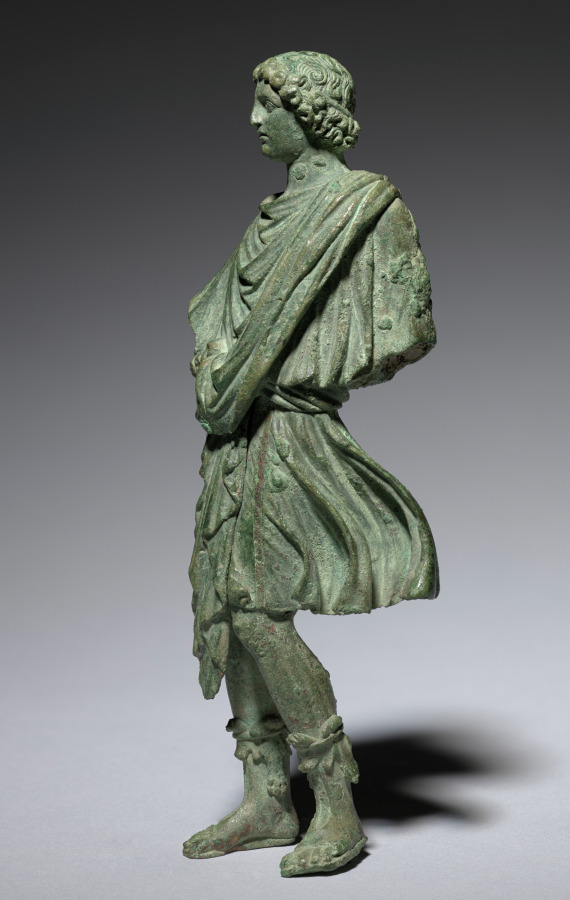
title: Lar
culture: Italy, Rome, Early Imperial period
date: 1–25 CE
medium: bronze with copper inlays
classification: Sculpture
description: This youthful bronze figure wears a short tunic with copper inlaid stripes and open-toed boots with animal-skin liners. The figure’s arms are missing, but based on other surviving examples, they likely held a libation dish and cornucopia. Even without these attributes, the figure can be identified through dress and stance as a type of Lar, or domestic deity, known as the Lar Familiaris (Household Lar), standing in a characteristic "quiet pose." Other types of Lares include the Lares Compitales and Lares Augusti (Lares of crossroads and of Augustus, respectively).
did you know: This statuette likely stood with other small bronzes in a household shrine called a lararium.